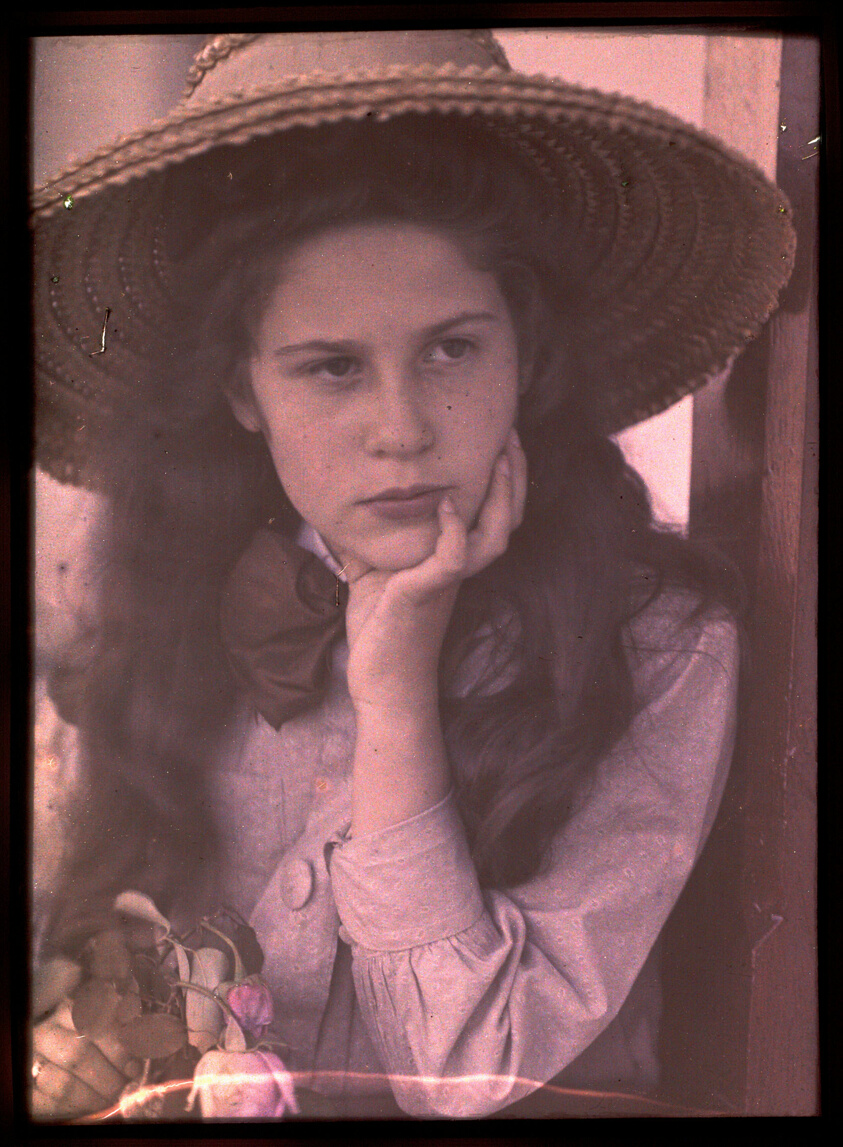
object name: Photograph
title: Kitty Stieglitz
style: Pictorialism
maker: Alfred Stieglitz (American, 1864–1946)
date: c. 1907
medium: Autochrome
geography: United States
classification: autochrome; photographic process; photography; photograph